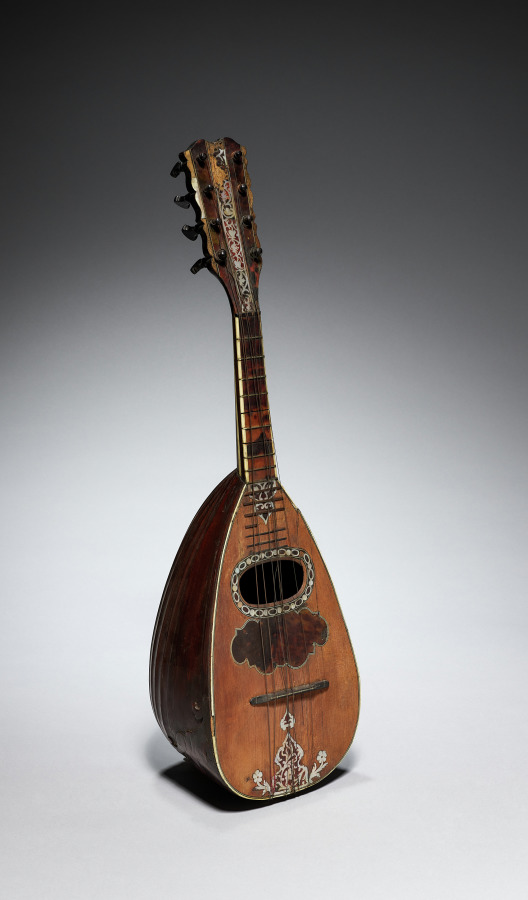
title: Mandoline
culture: Italy, Naples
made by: Giovanni Battista (Italian)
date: 1785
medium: wood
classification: Musical Instrument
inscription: bears a label which reads: "Gio: Battista Fabricatore fecit An 1785 in S. M. dell' Ajuto Napoli."